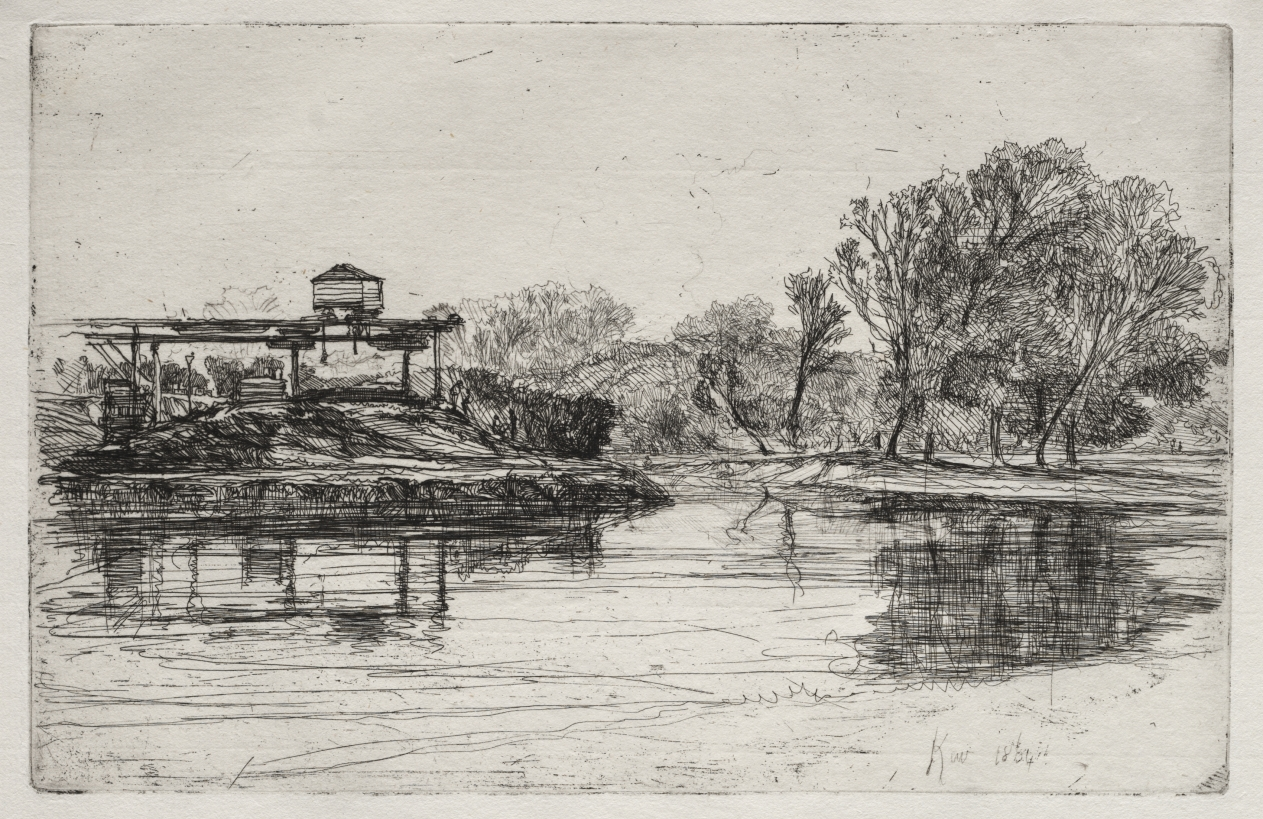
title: Railway Encroachment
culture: England, 19th century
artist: Francis Seymour Haden (British, 1818–1910)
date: 1864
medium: etching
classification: Print